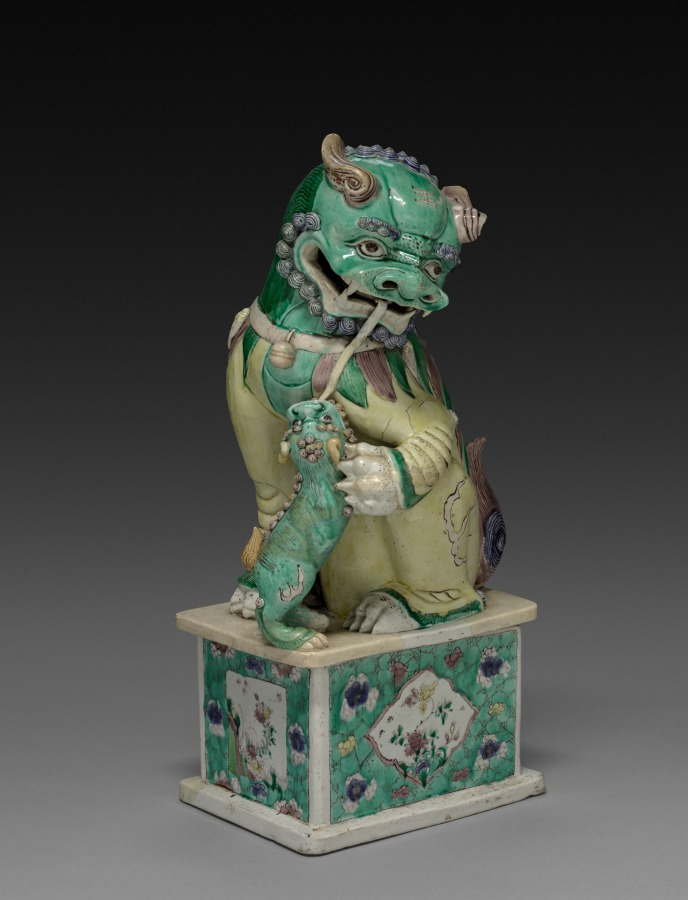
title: Lion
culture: China, Qing dynasty (1644-1911), Kangxi reign (1661-1722)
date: 1662–1722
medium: porcelain with overglaze enamel decoration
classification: Sculpture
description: This porcelain lion is a pair with 1930.643. The female is with a cub, while the male lion holds a ball. Guardian lions were traditionally placed in front of buildings to protect from harmful spiritual or human forces.